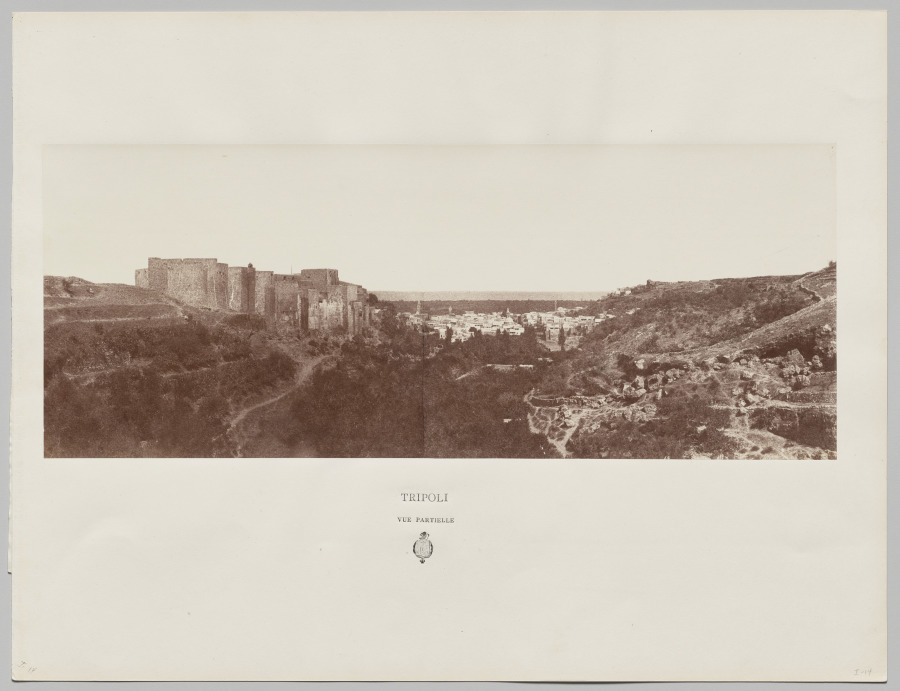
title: Tripoli, Vue Partielle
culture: France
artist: Louis de Clercq (French, 1836–1901)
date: 1859–60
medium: albumen panoramic print from two waxed paper negatives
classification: Photograph